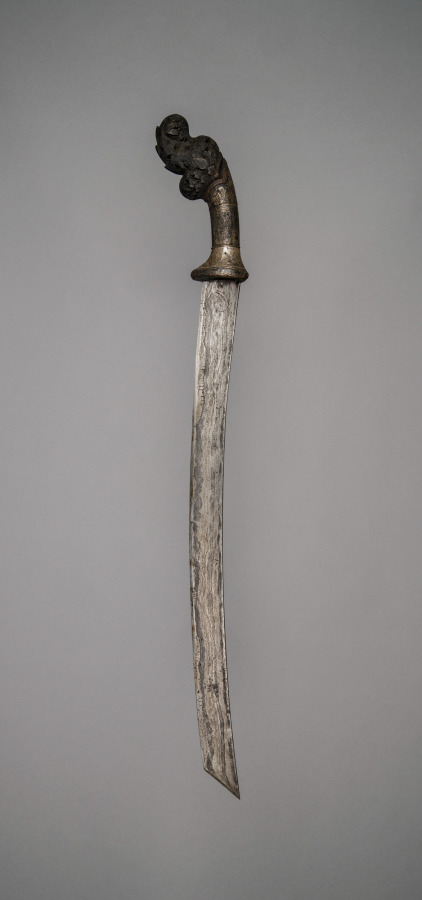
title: Sword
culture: Indonesia, Sulawesi (Celebes)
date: before 1918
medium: metal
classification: Arms and Armor